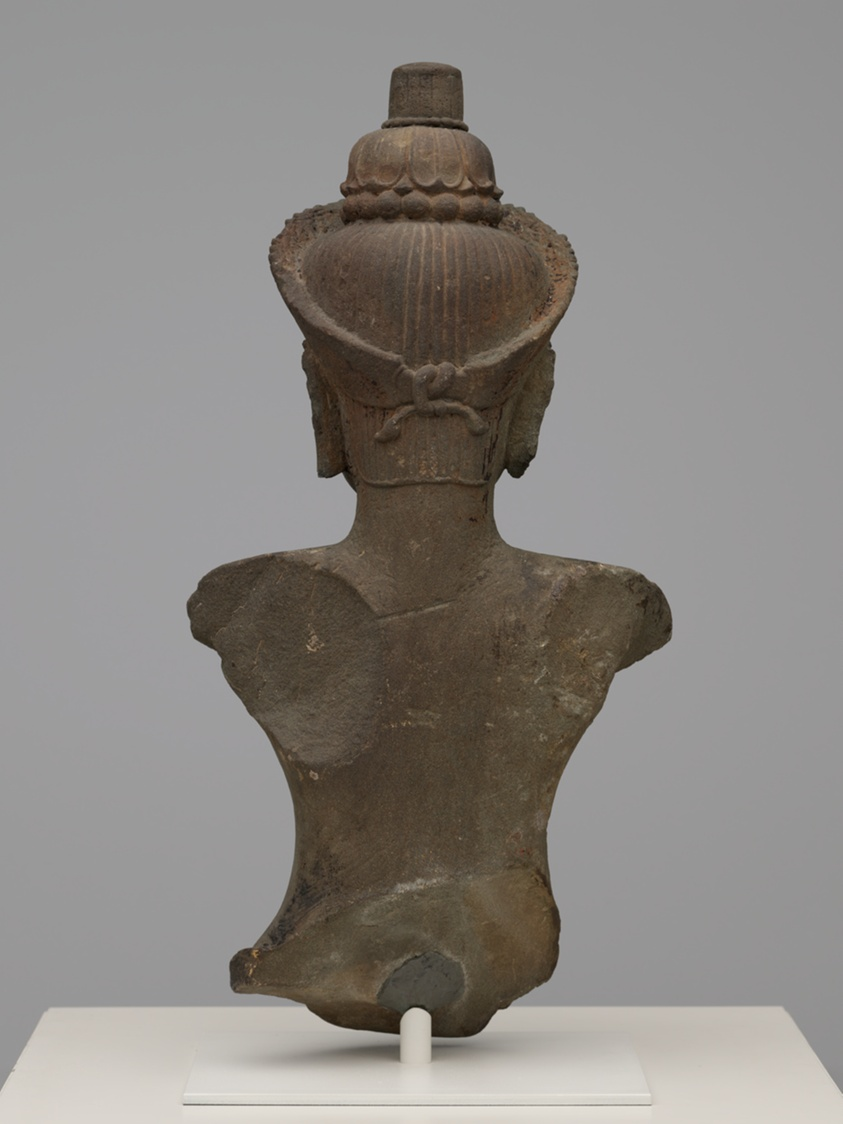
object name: Sculpture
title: Bust of a Female Deity (Devi)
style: Southeast Asian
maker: Cambodia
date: Angkor period, 10th/11th century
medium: Sandstone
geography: Cambodia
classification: stone (unidentified); stone; sculpture; asian art